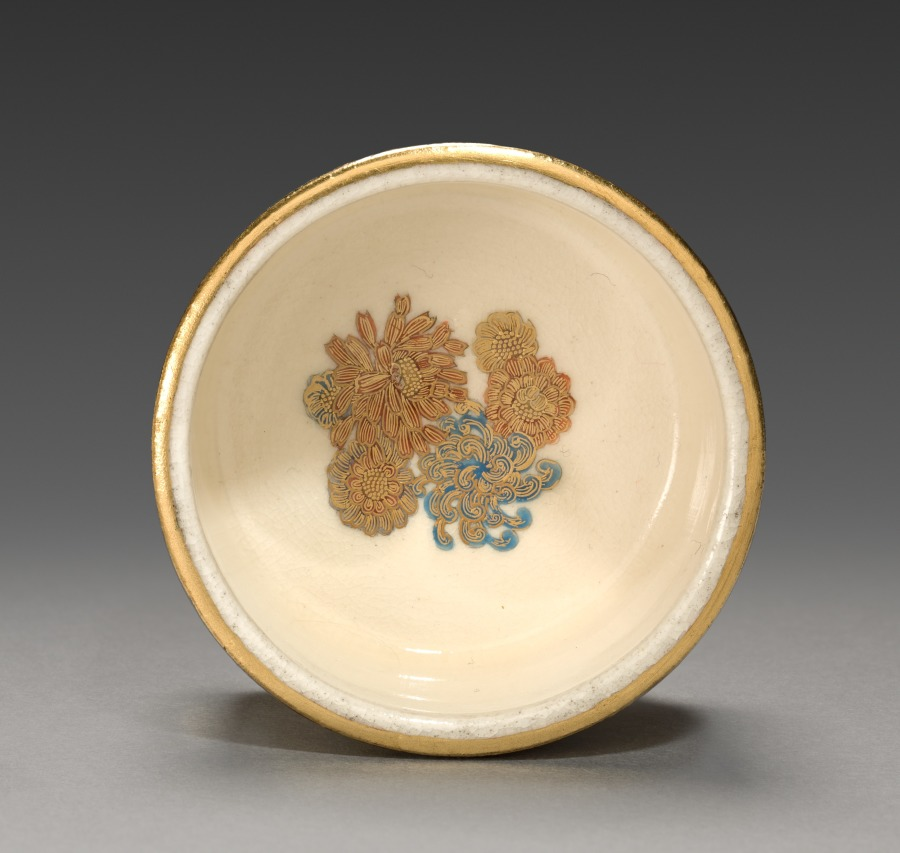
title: Jar with Butterflies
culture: Japan, Meiji period (1868–1912)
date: late 1800s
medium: porcelain (Satsuma ware)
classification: Ceramic